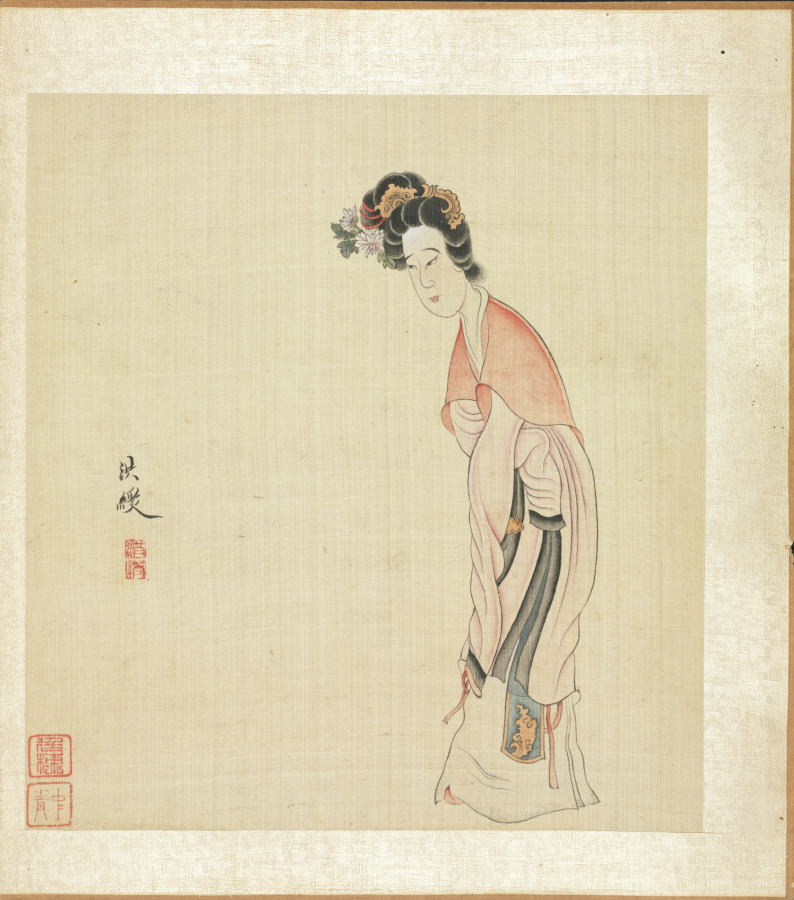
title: Paintings after Ancient Masters: A Lady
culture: China, Ming dynasty (1368–1644)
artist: Chen Hongshou (Chinese, 1598/99–1652)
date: 1598–1652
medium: album leaf, ink and color on silk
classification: Painting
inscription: Hongshou. [seal] Hongshou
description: The twenty paintings in this double-album by Chen Hongshou include landscapes, figures, and flowers. It also has one leaf featuring a woman, an often-used subject not found in the other albums from the latter part of his career. His late works are wonderful summations of Chen's peculiar and quirky art--archaistic, hyper-refined--but without accompanying shallowness or sentimentality. His figures and landscapes in the late albums are miniaturized, not unlike the small Chinese gardens, or the carefully selected small table rocks or old roots used for contemplation to see the world in miniature. This loss of scale is quite deliberate and reflects the psychological situation of a depressed class like the Ming loyalist officials and scholars, deprived of their integrity and honor, and forced to lead a diminished and restricted existence.